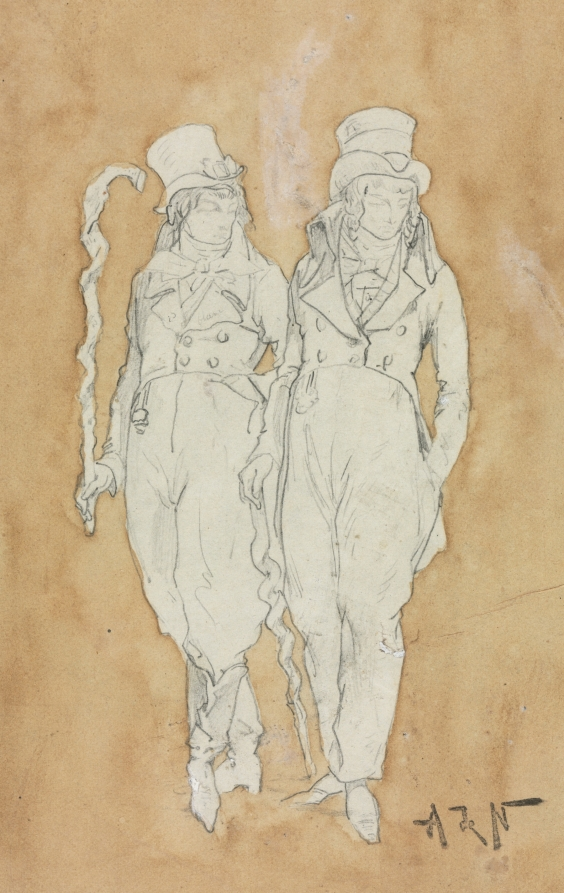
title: Two Young Men of Fashion (Standing)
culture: France, 19th century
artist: Alphonse Marie Adolphe de Neuville (French, 1835–1885)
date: second half 19th century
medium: graphite and brown wash; framing lines in graphite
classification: Drawing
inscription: signed, lower right, stamped in black ink (see Lugt Supplement 1942b): A de N ; across bottom, in graphite: sur papier bleu / tres soigne ; VERSO OF TERTIARY SUPPORT, upper center, in graphite: See cat. "Clev. Art Loan Ex" / 1894 / A48C635 [underlined] / A79 p. 35 / for inf. on Neuville ; center right, in graphite: A. de Neuville ; lower right, in graphite: #2 25ºº